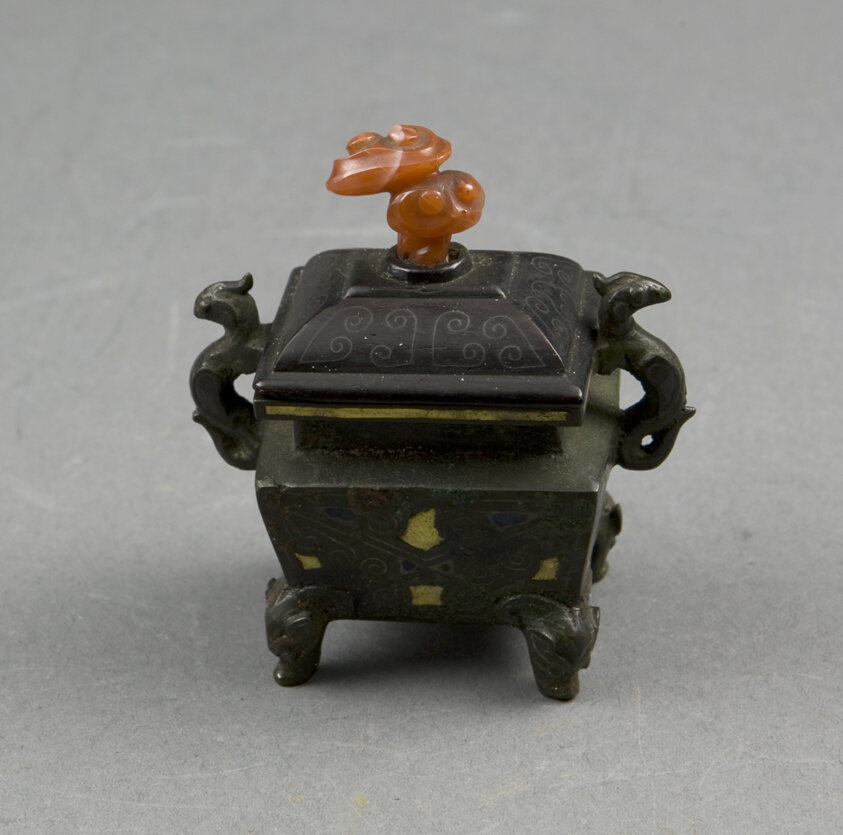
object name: Vessel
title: Miniature Vessel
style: Chinese (culture or style)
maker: China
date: Ming dynasty (1368–1644) or Qing dynasty (1644–1911)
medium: Bronze with inlay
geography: China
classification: bronze; metal; decorative object/ornament; asian art; vessel